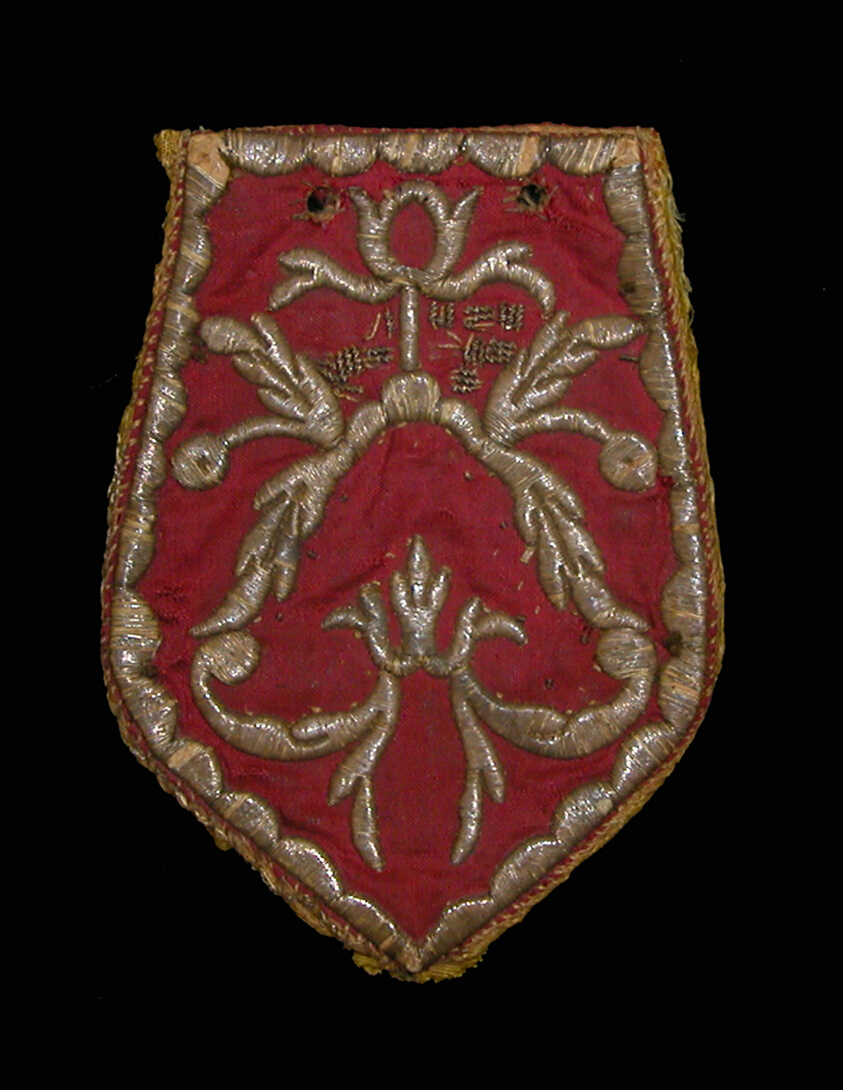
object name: Costume and Accessories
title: Bag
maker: France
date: 1680/1700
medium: Silk, plain weave; embroidered with gilt-metal-strip-wrapped silk laid over padding and silk-wrapped metal purl; lining: silk, plain weave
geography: France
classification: textile; bag - needlework; costume accessory - bag; costume accessory; costume